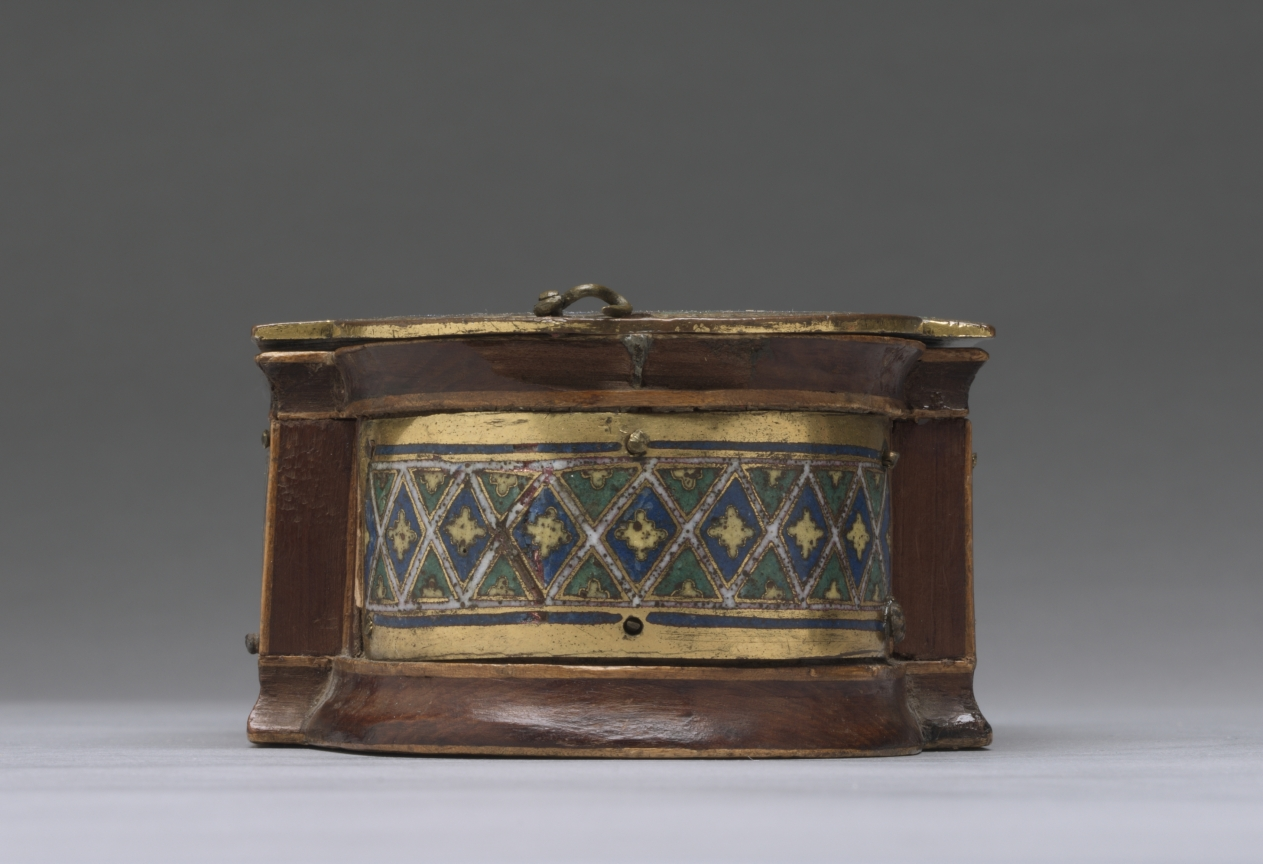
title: Pyx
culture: Germany, Lower Saxony, Hildesheim?, Romanesque period, enamels: 12th century; wood core: 19th century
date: c. 1170–1180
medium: gilded copper, champlevé and cloisonné enamel, wood core (modern)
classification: Enamel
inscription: + H[A]EC DATA P[ER] IVSTV[M] […]AT IN CRVCE VICTIMA CHR[ISTV]M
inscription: + HOC ARIES P(RE)FERT Q[VO]D […] D[EV]S HOSTIA P[ER]FERT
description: The image of Christ’s crucifixion dominates this enameled box. Personifications of the Christian church, the Jewish faith, and the Virgin and Saint John flank the cross. Two Old Testament scenes--Abel’s sacrifice of sheep and Abraham’s sacrifice of Isaac--appear on either side. The box once served as a pyx, a container for the consecrated host, itself a symbol of Christ’s sacrifice.